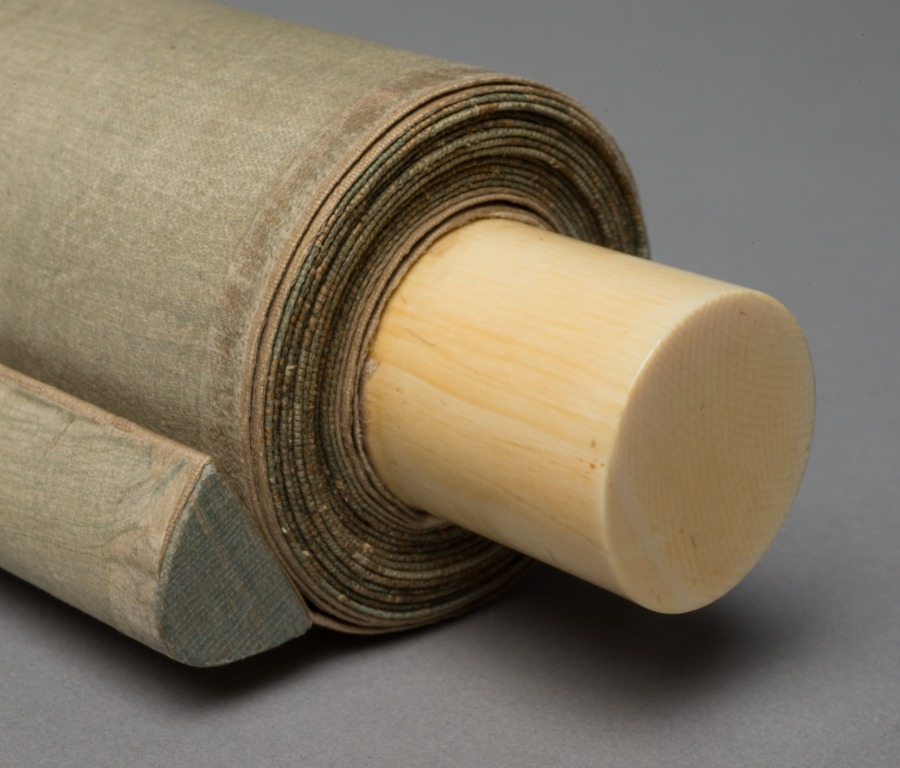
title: Peonies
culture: Japan, Edo period (1615–1868)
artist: Tatebayashi Kagei (Japanese, active mid-1700s)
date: mid 1700s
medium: hanging scroll; ink and color on paper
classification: Painting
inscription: lower right, Kagei's signature in black, a round red seal and a small square one.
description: A proliferation of white tree peonies dominates this composition. Behind them are tall, feathery-topped susuki grasses and leafy deciduous trees. Tatebayashi Kagei restricted his palette to ink with red and white color, along with sparing use of green in the peony leaves and the blades of grass. He made generous use of the “dripping-in” (tarashikomi) technique, layering pooled ink and color, in the peony leaves. The areas left in reserve create the impression of insect-eaten or late season foliage.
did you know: In 1738, Kagei received a copy made by Ogata Kōrin of a fan painting by Tawaraya Sōtatsu from Kōrin's brother Ogata Kenzan, so some think he trained with Kenzan in Edo (present-day Tokyo).